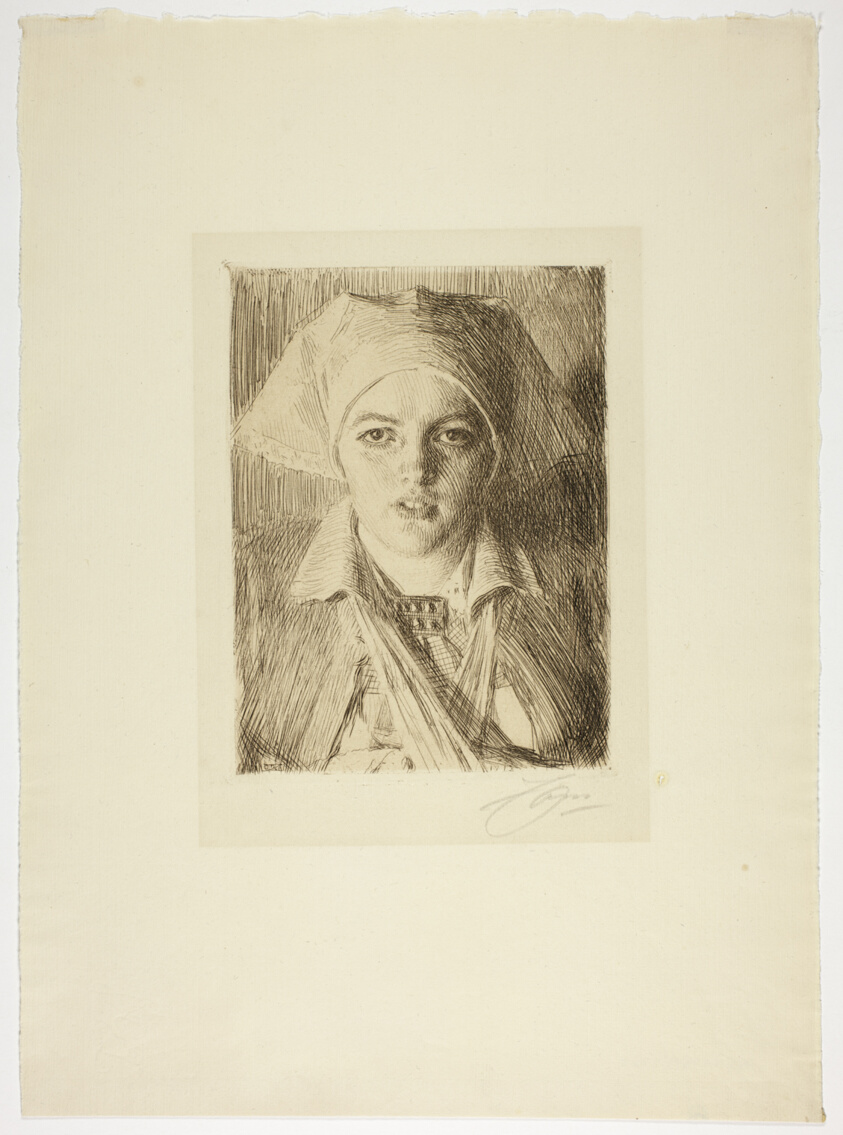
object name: Print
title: Gulli II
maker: Anders Zorn (Swedish, 1860-1920)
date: 1918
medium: Etching in black on ivory laid paper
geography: Sweden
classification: etching; paper; print; prints and drawing